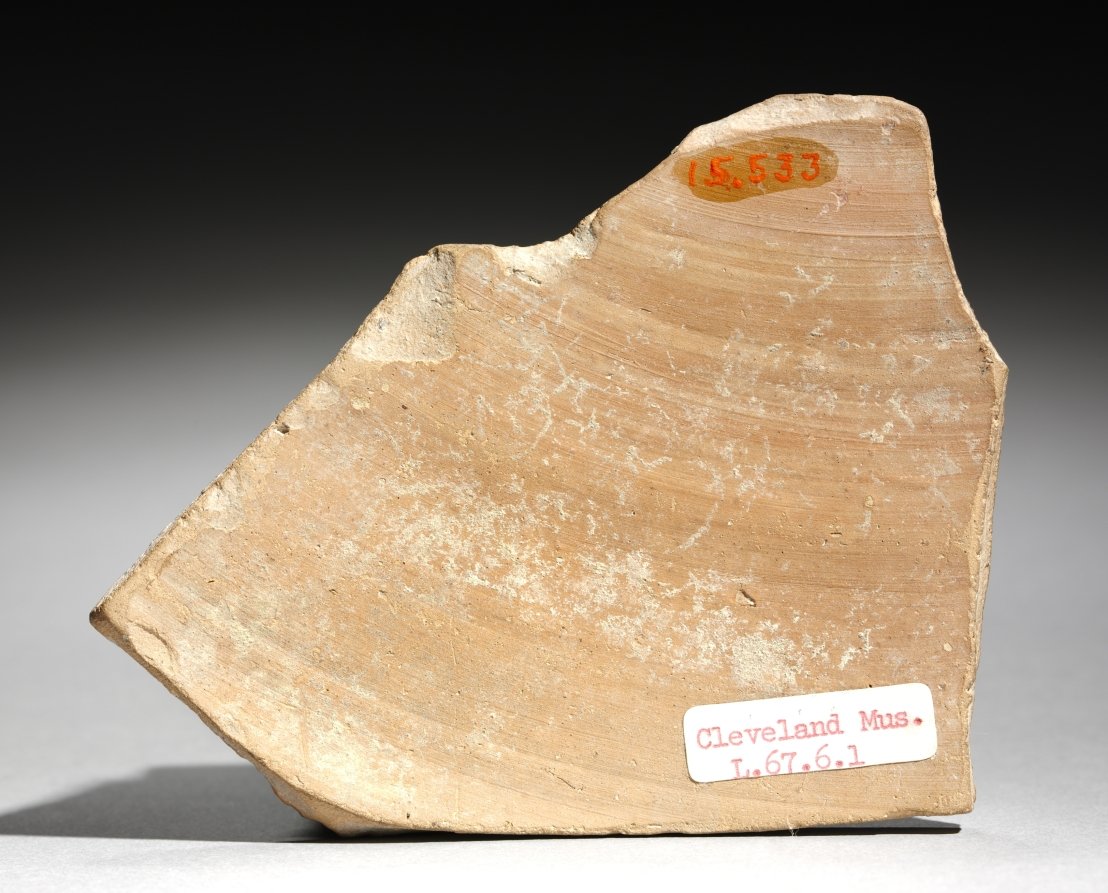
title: Fragment from Black-Figure Neck-Amphora of Panathenaic Shape (Storage Vessel): Apollo and Zeus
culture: Greek, Attic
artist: manner of Antimenes Painter (Greek, Attic, active c. 530–510 BCE)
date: c. 520 BCE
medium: ceramic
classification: Ceramic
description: Comparison with better-preserved vases—and with other artworks and monuments, such as the famous Siphnian Treasury at Delphi—helps to fill in some of the action no longer surviving from the rest of this vase, which once showed Apollo and Herakles struggling for the Delphic tripod. One claw-footed leg of the tripod survives, across the chest of Zeus, the bearded figure who intervened to stop the quarrel between two of his sons. Apollo is the unbearded figure at left, while Herakles would have appeared beyond the break on the right.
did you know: The claw-footed tripod leg before Zeus's chest identifies the scene—the struggle for the Delphic tripod.